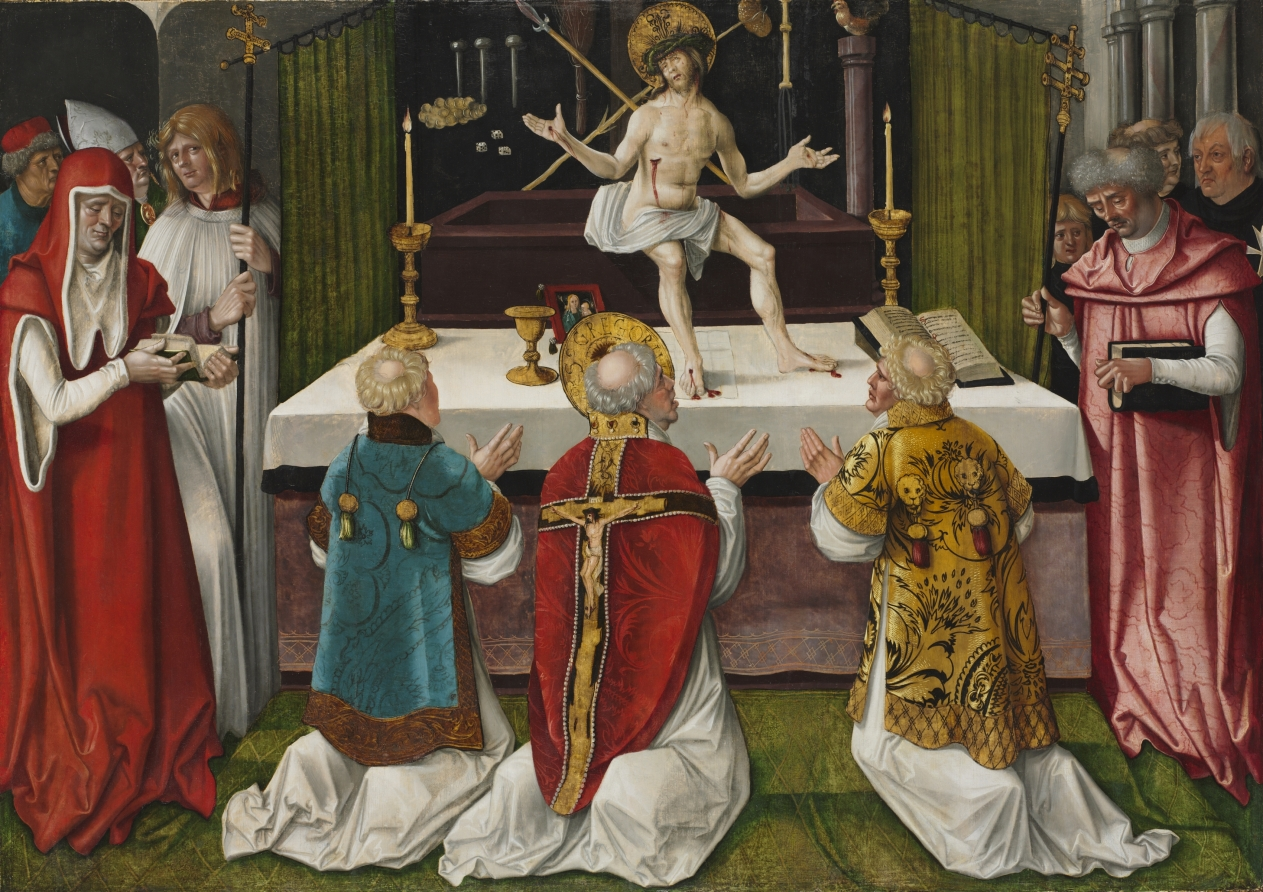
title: The Mass of Saint Gregory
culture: Germany, Strassburg, 16th century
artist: Hans Baldung (German, 1484/85–1545)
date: 1511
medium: oil and tempera on wood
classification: Painting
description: Saint Gregory was a late 6th-century pope and one of the fathers of the early Roman Church. This painting depicts the popular legend in which Gregory once overheard an onlooker express doubts about Christ’s actual presence at the altar during mass. In response, the saint’s immense faith was rewarded by a vision of Christ surrounded by the instruments and symbols of his passion. Saint Gregory, vested in his chasuble, kneels in the center, flanked by priests who share his amazement. This painting was part of an altarpiece commissioned by Erhard Künig, a member of a charitable lay order for a monastery near Strassburg. Künig stands at the far right wearing a Maltese cross. The two wings of the altar, showing respectively Saint John the Evangelist and Saint John the Baptist, are in New York and Washington. Hans Baldung was both a painter and a printmaker and is regarded as one of the most gifted students of Albrecht Dürer.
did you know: Saint Gregory was a 6th-century pope and one of the fathers of the early Roman church. The artist, Hans Baldung, chose to depict the historical legend of Gregory's vision in a scene reminiscent of his own time period, 900 years after this pope actually lived.